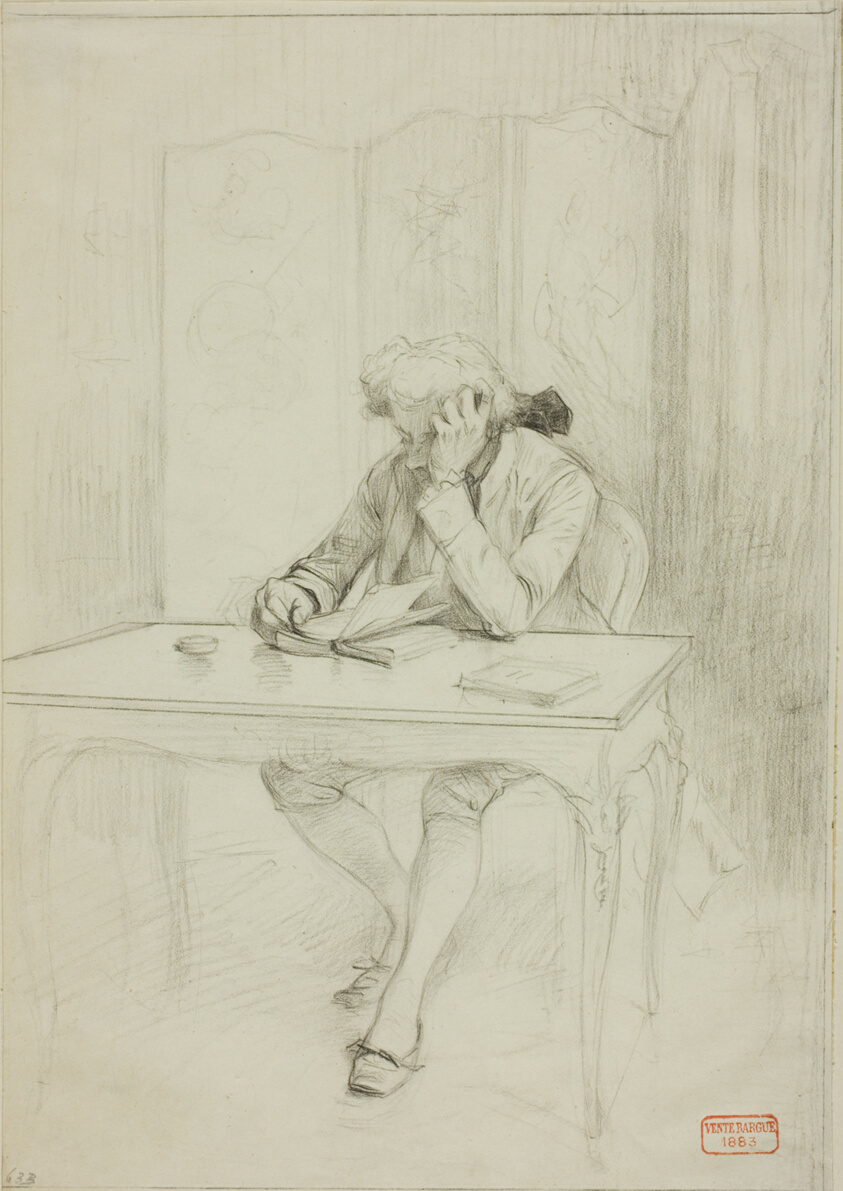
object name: Drawing and Watercolor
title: Man in Eighteenth-Century Dress, Seated at Table and Reading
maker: Charles Bargue (French, 1826-1883)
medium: Black crayon on ivory wove paper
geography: France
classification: chalk; drawings (visual works); prints and drawing